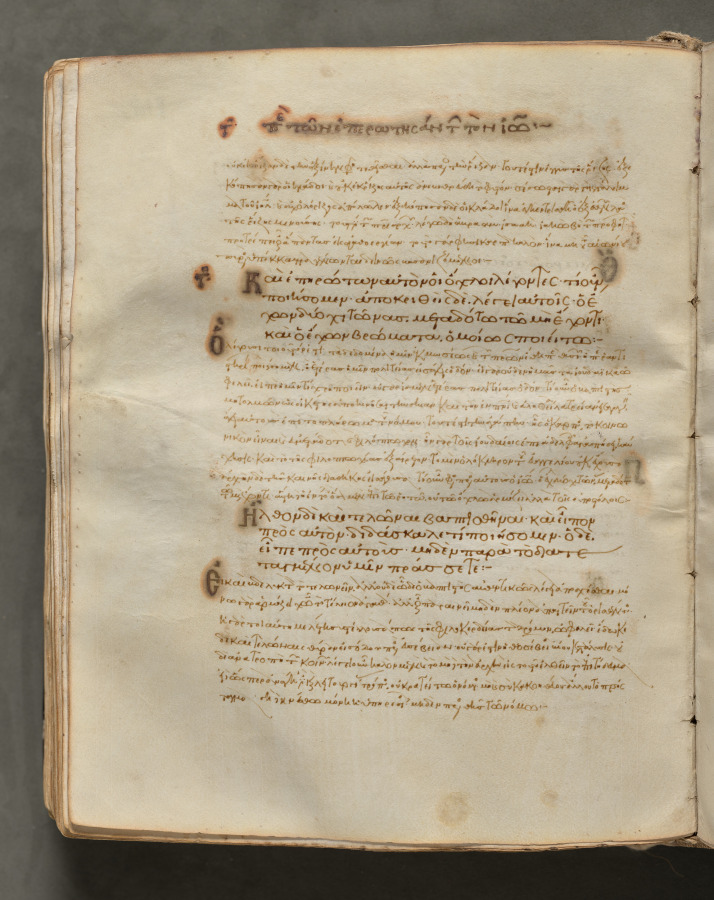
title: Text, folio 214 (verso), from a Gospel Book with Commentaries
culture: Byzantium, Constantinople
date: c. 1000–1100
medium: ink, tempera, and gold on vellum; leather binding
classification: Bound Volume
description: Each of the four gospels in this book opens on a page with brilliantly illuminated borders depicting the author of the text as well as birds-principally peacocks, symbols of the immortality of the soul-and fountains, representing the fountain of life and the salvation of the soul. This volume consists of 428 leaves with texts in Greek. Its level of sophistication suggests that it was probably written and decorated in a monastery in Constantinople.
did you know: Gospel Books were carried in procession through Byzantine churches.